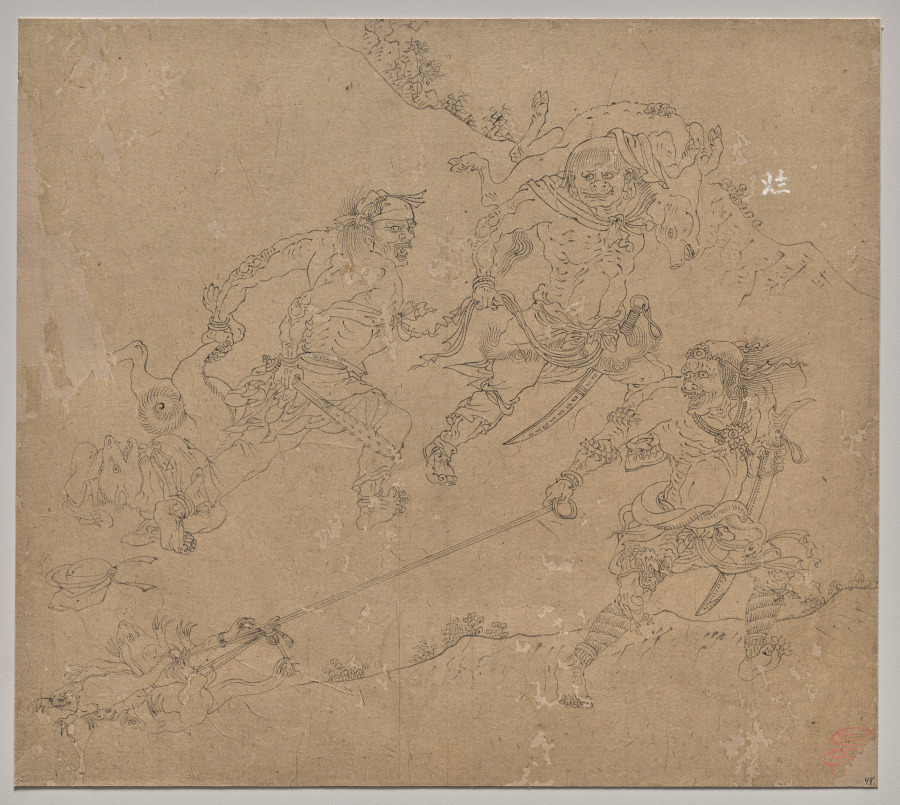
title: Album of Daoist and Buddhist Themes: Search the Mountain: Leaf 48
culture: China, Southern Song dynasty (1127-1279)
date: 1200s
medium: Album, ink on paper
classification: Painting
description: This extraordinary album has 50 paintings on a variety of religious subjects. They were likely created by several master craftsmen to share with studio apprentices as models for fulfilling commissions. The Jade Emperor and the Daoist pantheon make up the first 26 leaves. The next 14 leaves portray the Buddhist Ten Kings of Hell administering punishments to the dead. The third section, called “Clearing the Mountains,” features divine soldiers, led presumably by the deity Erlang Shen 二郎神, fighting undesirable creatures.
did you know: Below, a soldier drags two frogs behind him with a rope. Above, a demon drags a fox by its leg; another carries a cow over his shoulders.